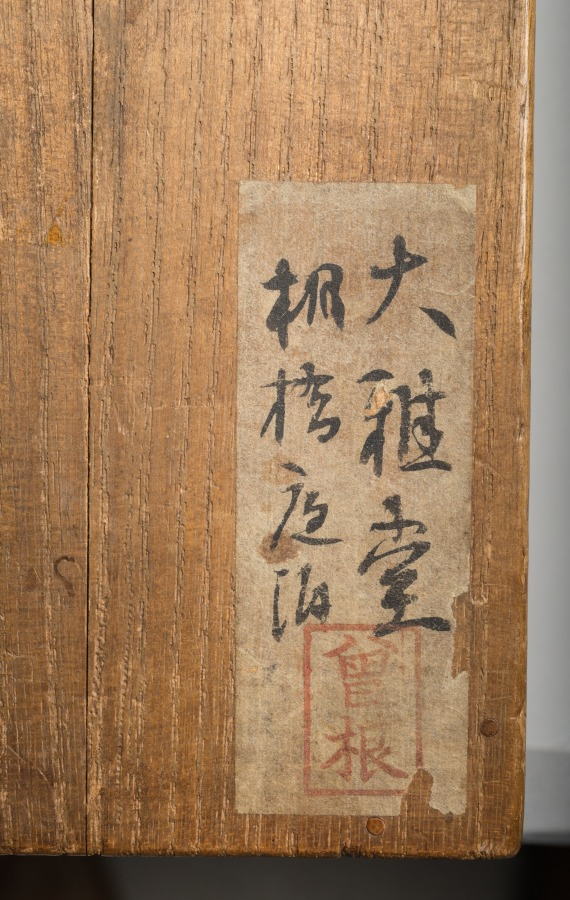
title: Illustration of Zhang Qi's Poem on the Cold Mountain Temple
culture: Japan, Edo period (1615–1868)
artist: Ike Taiga (Japanese, 1723–1776)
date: mid- to late 1700s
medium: hanging scroll; ink and color on paper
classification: Painting